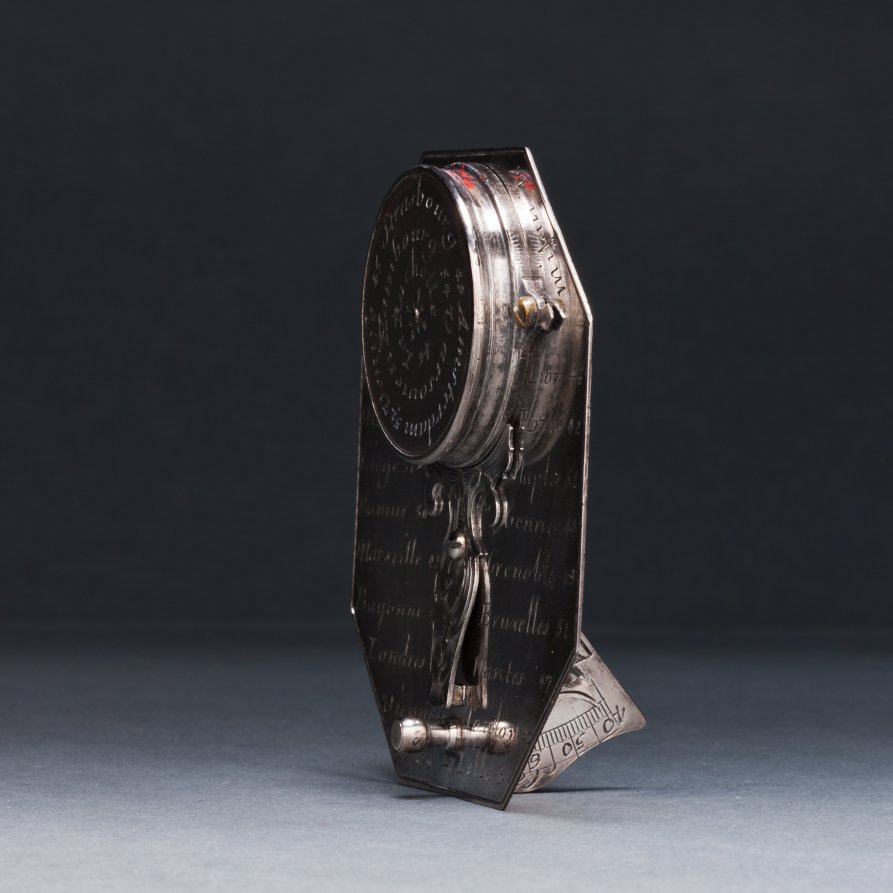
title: Butterfield Sundial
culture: France, 18th century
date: 1700s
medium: silver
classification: Silver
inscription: [Engraved signature above the compass in ribbon band]: "N. BION A Paris"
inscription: [Engraved on the face of the sundial]: “Pour 55° 4-5-6-7-8-9-10-11 50° IIII-V-VI-VII-VIII-IX-X-XI 45° 5-6-7-8-9-10-11 40° -VI-VII-VIII-IX-X-XI'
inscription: [Engraved on the other side]: "Pour 55° -8-7-6-5-4-3-2-1-0 50°-VIII-VII-VI-V-IIII-III-II-I 45°-8-7-6-5-4-3-2-1 40°-VII-VI-V-IIII-III-II-I"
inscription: [Engraved around the compass]: “NORD-OUEST-SUD-EST”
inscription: [Engraved on the back of the sundial]: “Turin 44 Milan 46 Paris 49 Lion 46 Metz 49 Rome 42 Liege 51 Naples 44 Namur 50 Gennes 44 Marseille 43 Grenoble 45 Bayonne 43 Bruxelle 51 Londres 52 Nantes 47 Vienne 48 Toulon 43 Tours 47 Lille 51”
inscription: [Engraved around the back of the compass]: “Venise 45 Strasbourg 49 Amsterdam 52 Hambourg 54 Varsovie 52 La Rochelle 46”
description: Butterfield-type sundials are characterized by their adjustable gnomons, metal flaps that cast a shadow on the dial’s face to indicate the hour, and geographical indices. This sundial has a scale adjustable between latitudes of 40° to 60° north. The latitudes of 26 European towns are engraved on its back for quick reference. With an intricately engraved silver face, it would have functioned as a fashionable traveler’s accessory.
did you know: Butterfield-style sundials were named after Micheal Butterfield, an English scientific and mathematical instrument maker who worked in Paris between 1674 and 1724.